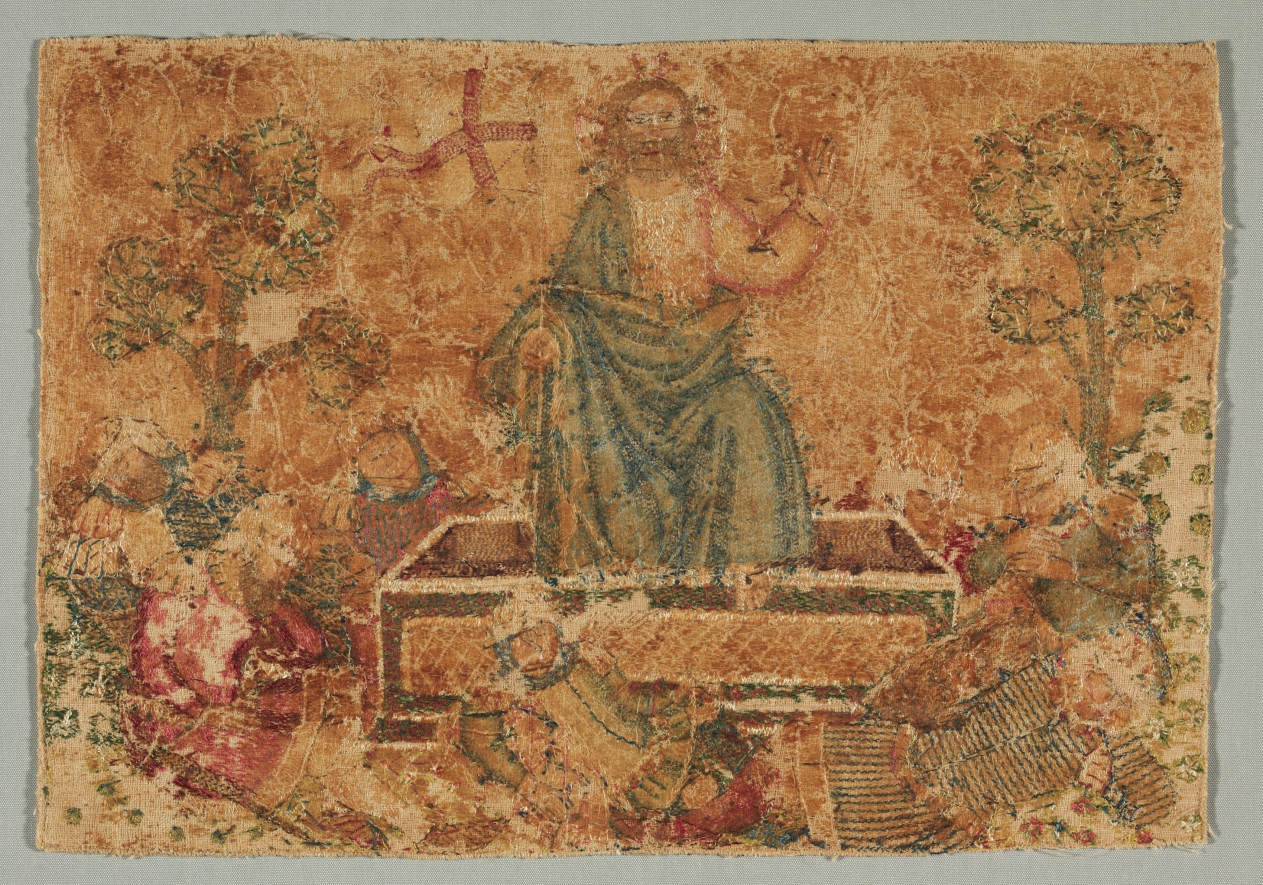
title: The Resurrection, from an Altar Frontal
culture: Italy, Florence, 14th century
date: 1375–1400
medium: Silk, gold and cotton thread, linen; raised work, embroidery: split, stem, and couching stitches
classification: Embroidery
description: This scene of the Resurrection, along with 11 additional embroideries of the life of Christ, may have formed an altar frontal, a hanging decorating the front of an altar. Originally, expensive gold thread covered the background, but it was removed and probably melted down for its monetary value. The loss of the gold exposes a rarely seen preparatory drawing on the linen ground created by an unidentified painter. Now exposed, thick cotton thread forms scrolling vines that, when covered with radiant gold thread, would have paralleled the effect of raised plaster decoration in paintings. What does survive is of the highest quality and refinement, including more than 20 brilliant shades of silk thread.